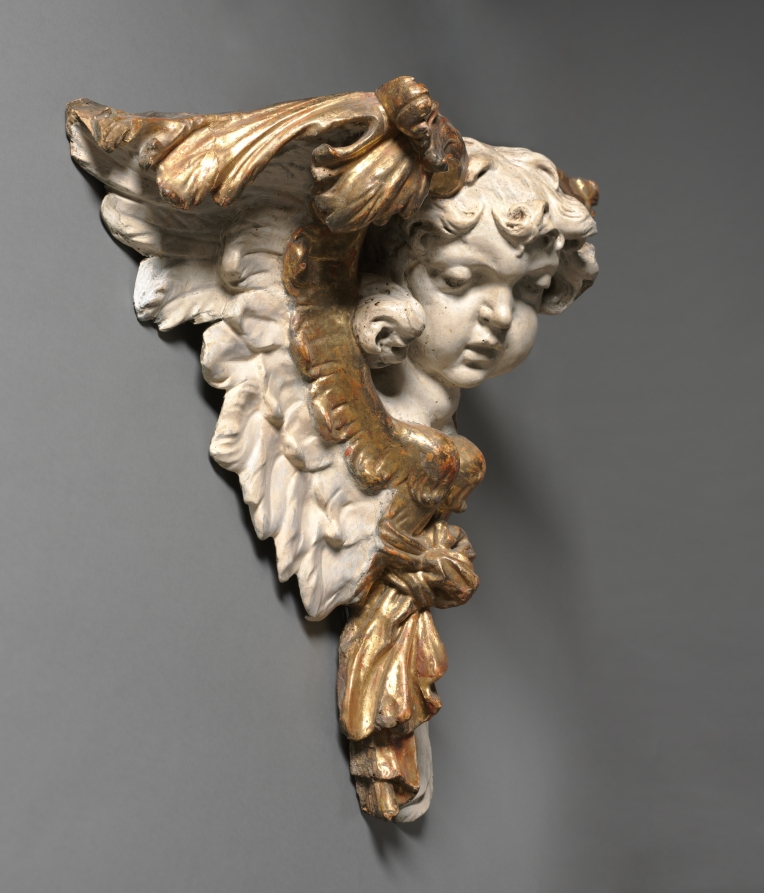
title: Head of an Angel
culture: Germany, 18th century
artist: Joseph Anton Feuchtmayer (German, 1696–1770)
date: c. 1750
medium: painted and gilded wood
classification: Sculpture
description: This decorative bracket was intended to simulate a functional supporting element at the top of a pilaster or beneath an organ loft or pulpit in a church. Joseph Anton Feuchtmayer, a member of a family of artists active in southern Germany and Switzerland, worked in a variety of media including wood and stucco. He often enlisted the aid of assistants, one of whom may have executed this work.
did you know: Part of the angel's wings are made more luxurious by the addition of gold paint, a process called "gilding."